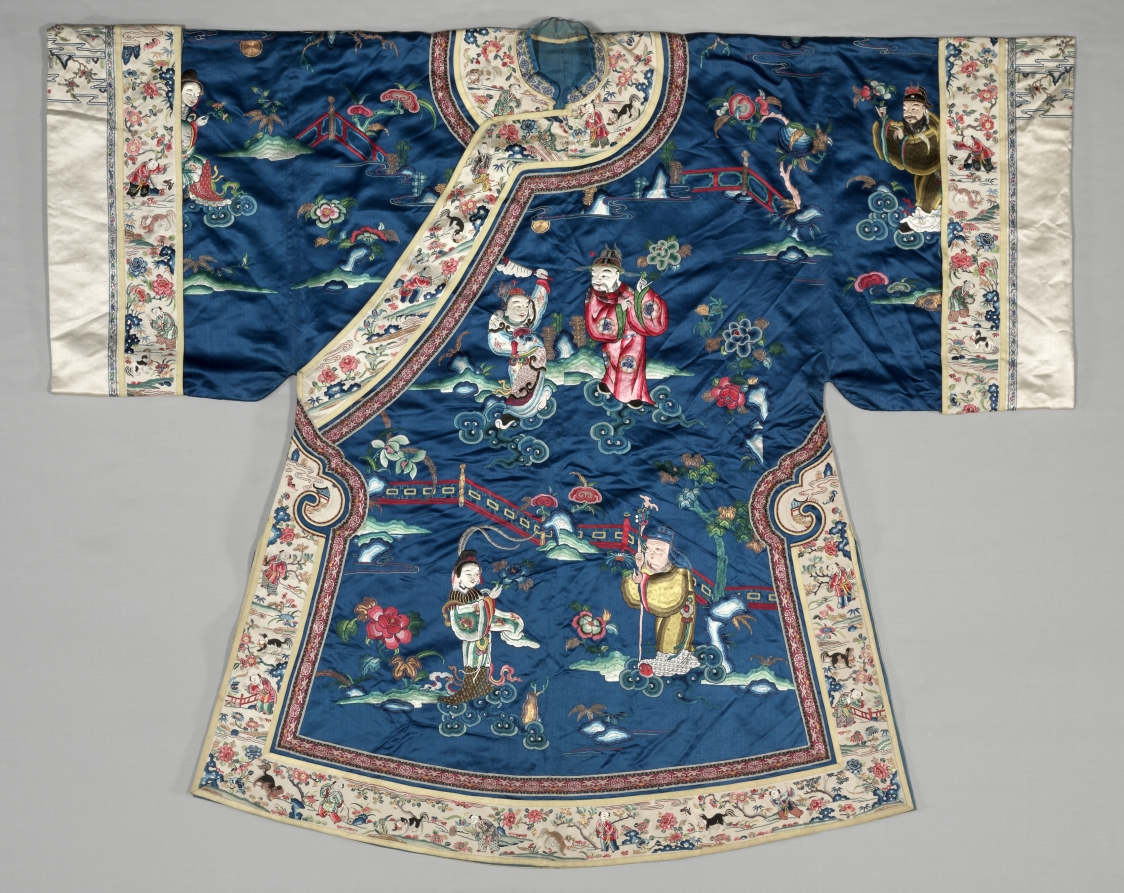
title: Han Woman's Coat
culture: China, Qing dynasty (1644-1911)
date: late 1800s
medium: Silk and gold thread: embroidery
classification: Garment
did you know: The coat's embroidered trim depicts animals and boys.